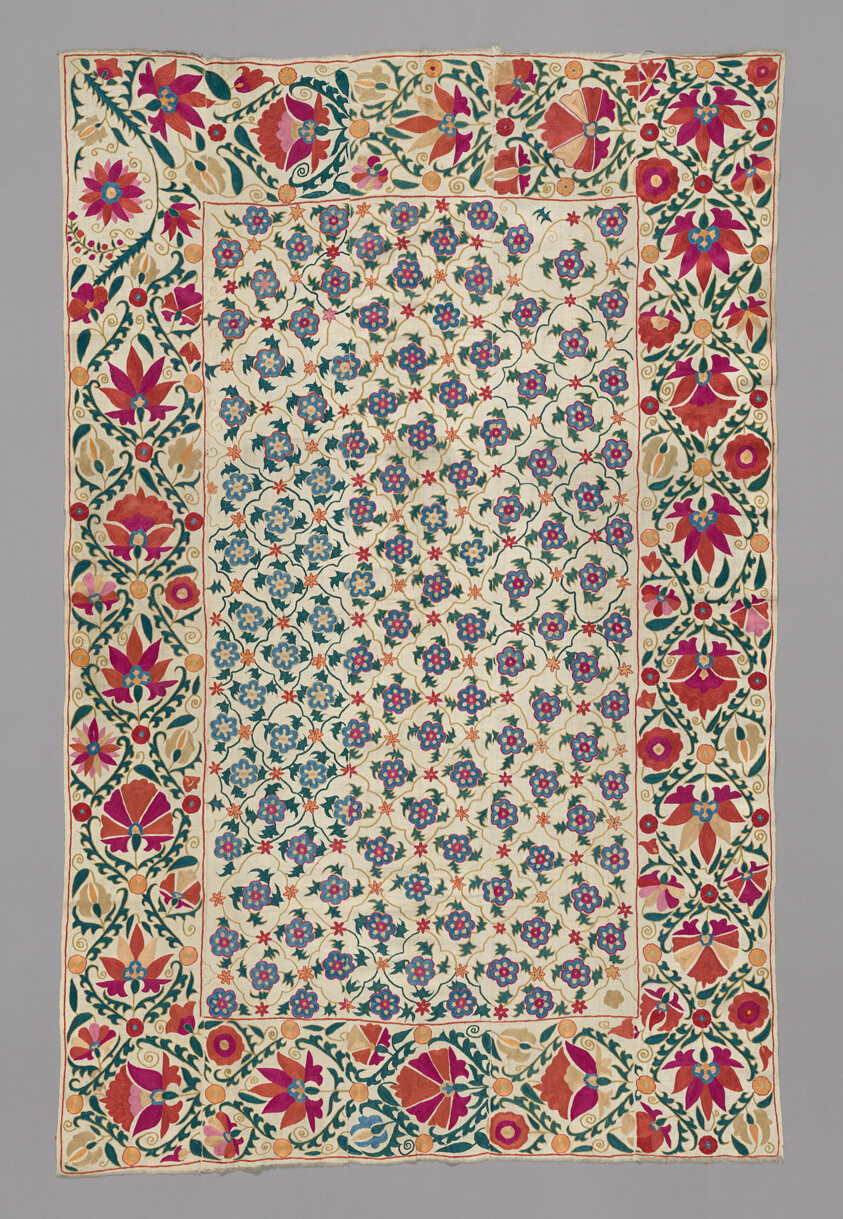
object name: Textile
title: Suzani (large embroidered hanging or cover)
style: 19th century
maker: Uzbekistan, possibly Shakhrisabz or Shafirkhan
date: 19th century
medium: Cotton, plain weave; embroidered with silk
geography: Uzbekistan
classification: needlework (visual works); textile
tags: botanical/floral, flowers, vines